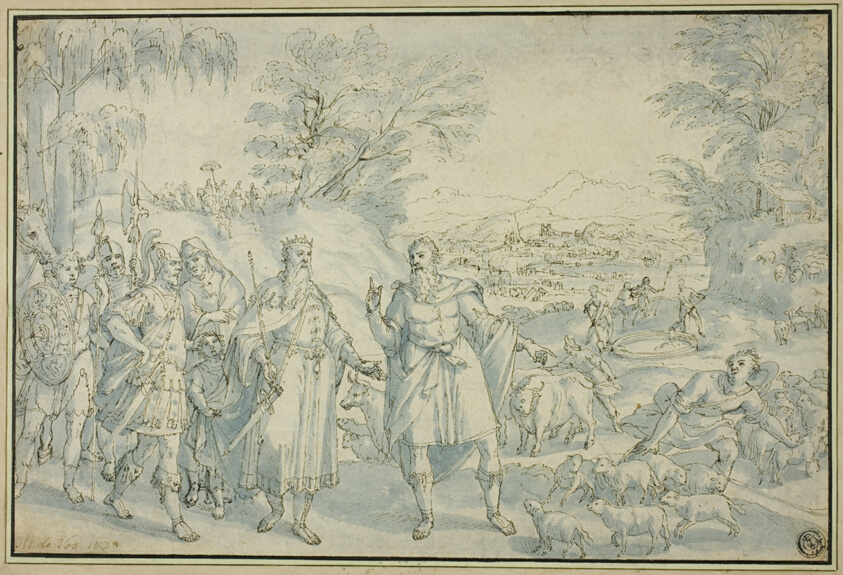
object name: Drawing and Watercolor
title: The Meeting of Abraham and Melchizedek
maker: Marten de Vos; Flemish, 1532-1603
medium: Pen and brown ink, with brush and blue wash, on ivory laid paper, laid down on card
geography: Flanders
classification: pen and ink drawings; drawings (visual works); prints and drawing